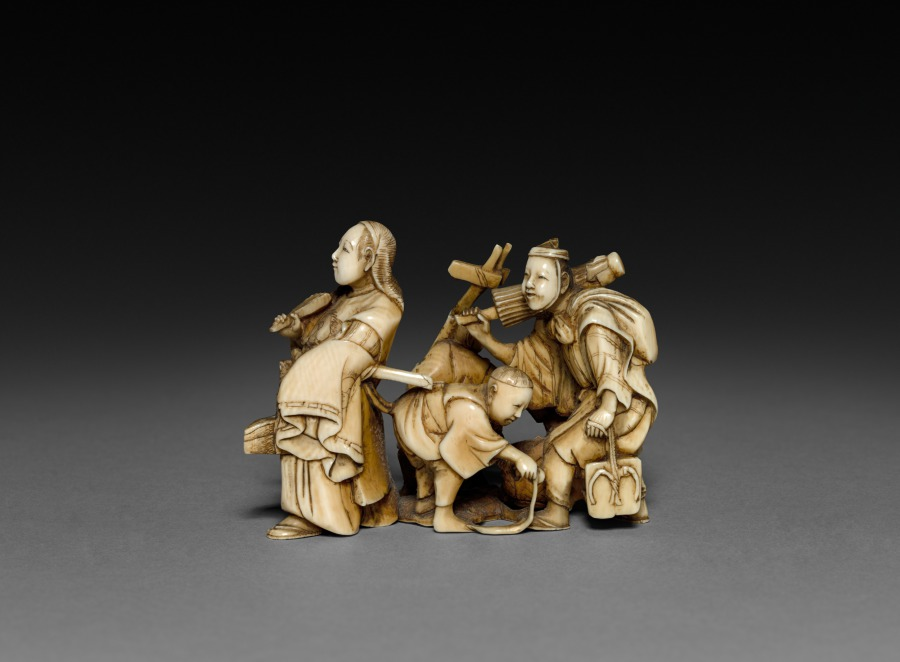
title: Procession with Four Figures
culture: Japan, Meiji period (1868–1912)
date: Late 1800s- Early 1900s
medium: ivory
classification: Ivory